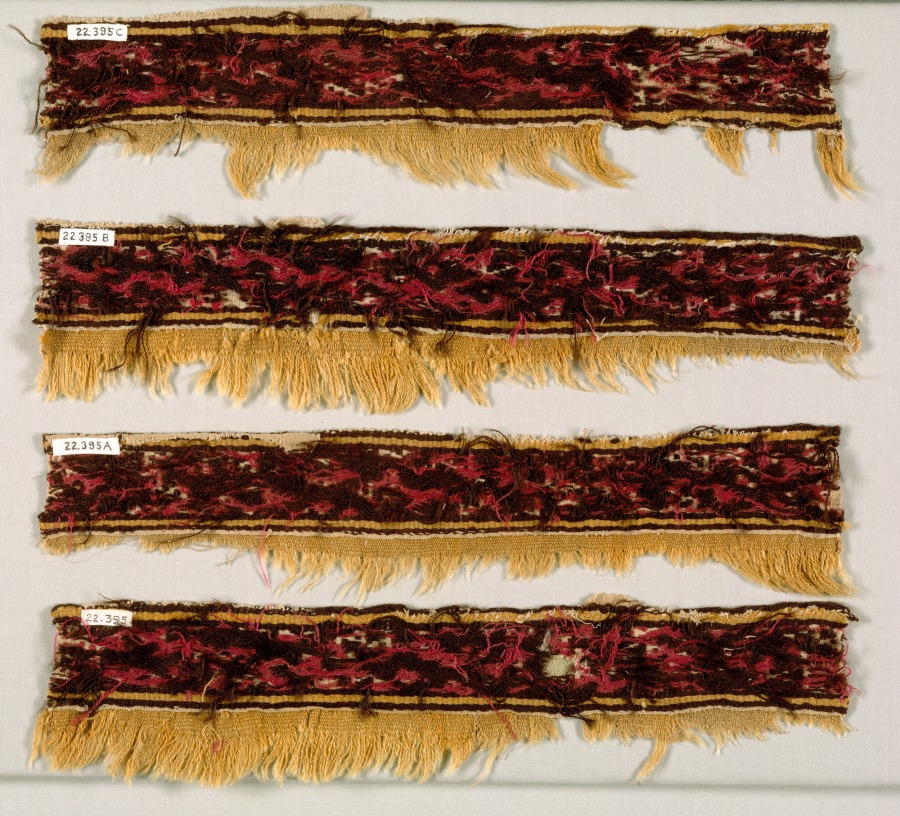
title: Four Border Strips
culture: Peru, Central Coast, Chancay, 12th-15th century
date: c. 1100–1400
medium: plain compound cloth; cotton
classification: Textile